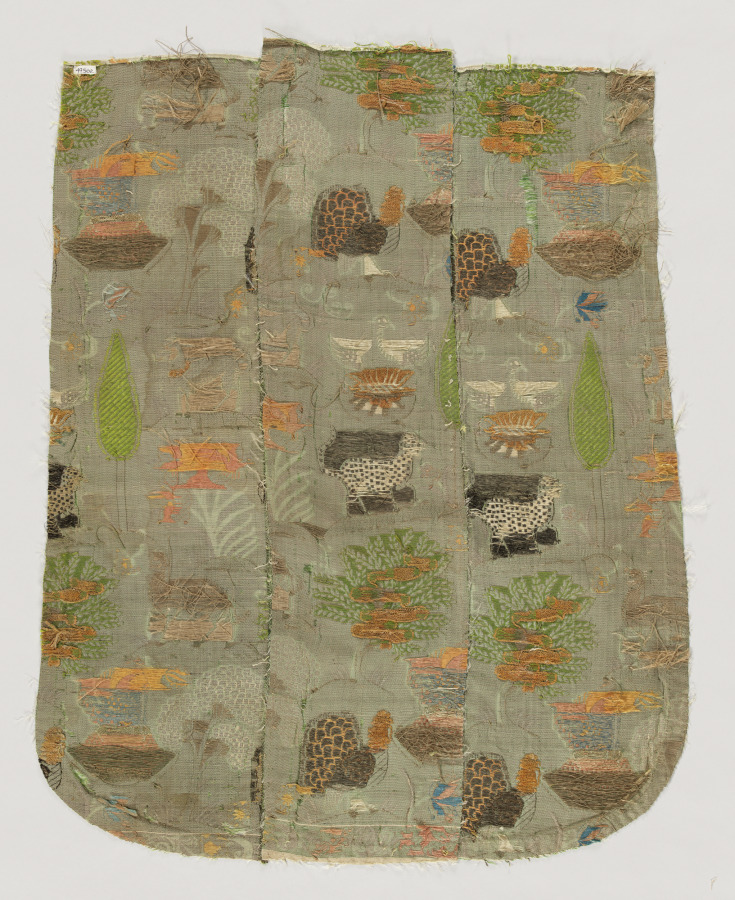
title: Half Chasuble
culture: Spain, Valencia, 18th century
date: 18th century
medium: plain compound cloth, brocaded; silk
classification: Textile